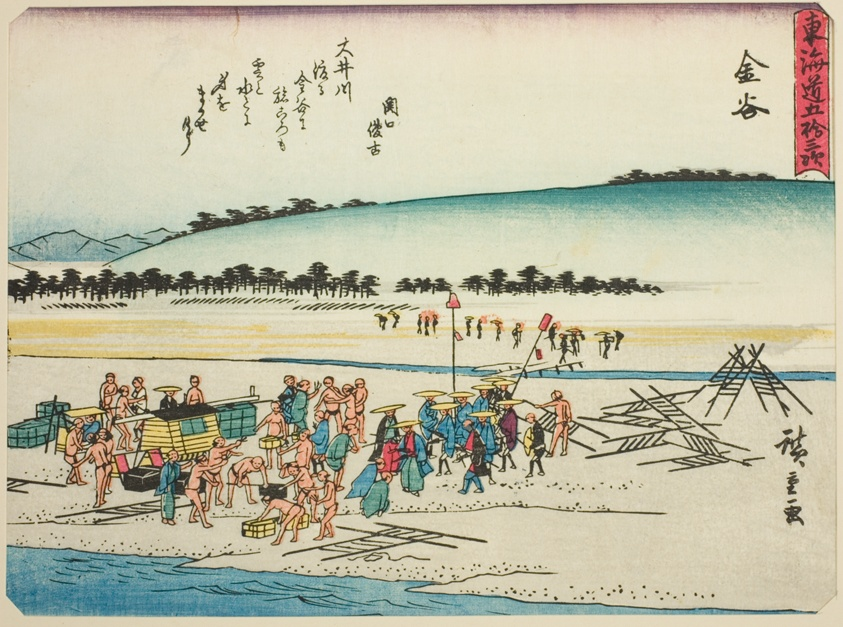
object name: Print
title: Kanaya, from the series "Fifty-three Stations of the Tokaido (Tokaido gojusan tsugi)," also known as the Tokaido with Poem (Kyoka iri Tokaido)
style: Japanese (culture or style)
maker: Utagawa Hiroshige 歌川 広重; Japanese, 1797-1858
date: c. 1837/42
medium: Color woodblock print; chuban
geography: Japan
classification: woodblock print; print; asian art